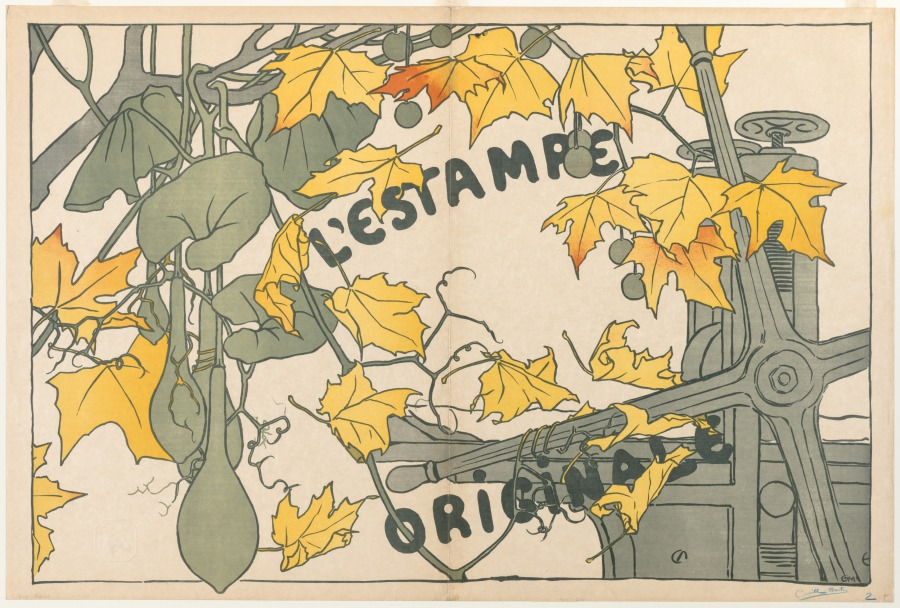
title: Cover for L'Estampe Originale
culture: France, 19th century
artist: Camille Martin (French, 1861–1898)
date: 1894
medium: lithograph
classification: Print